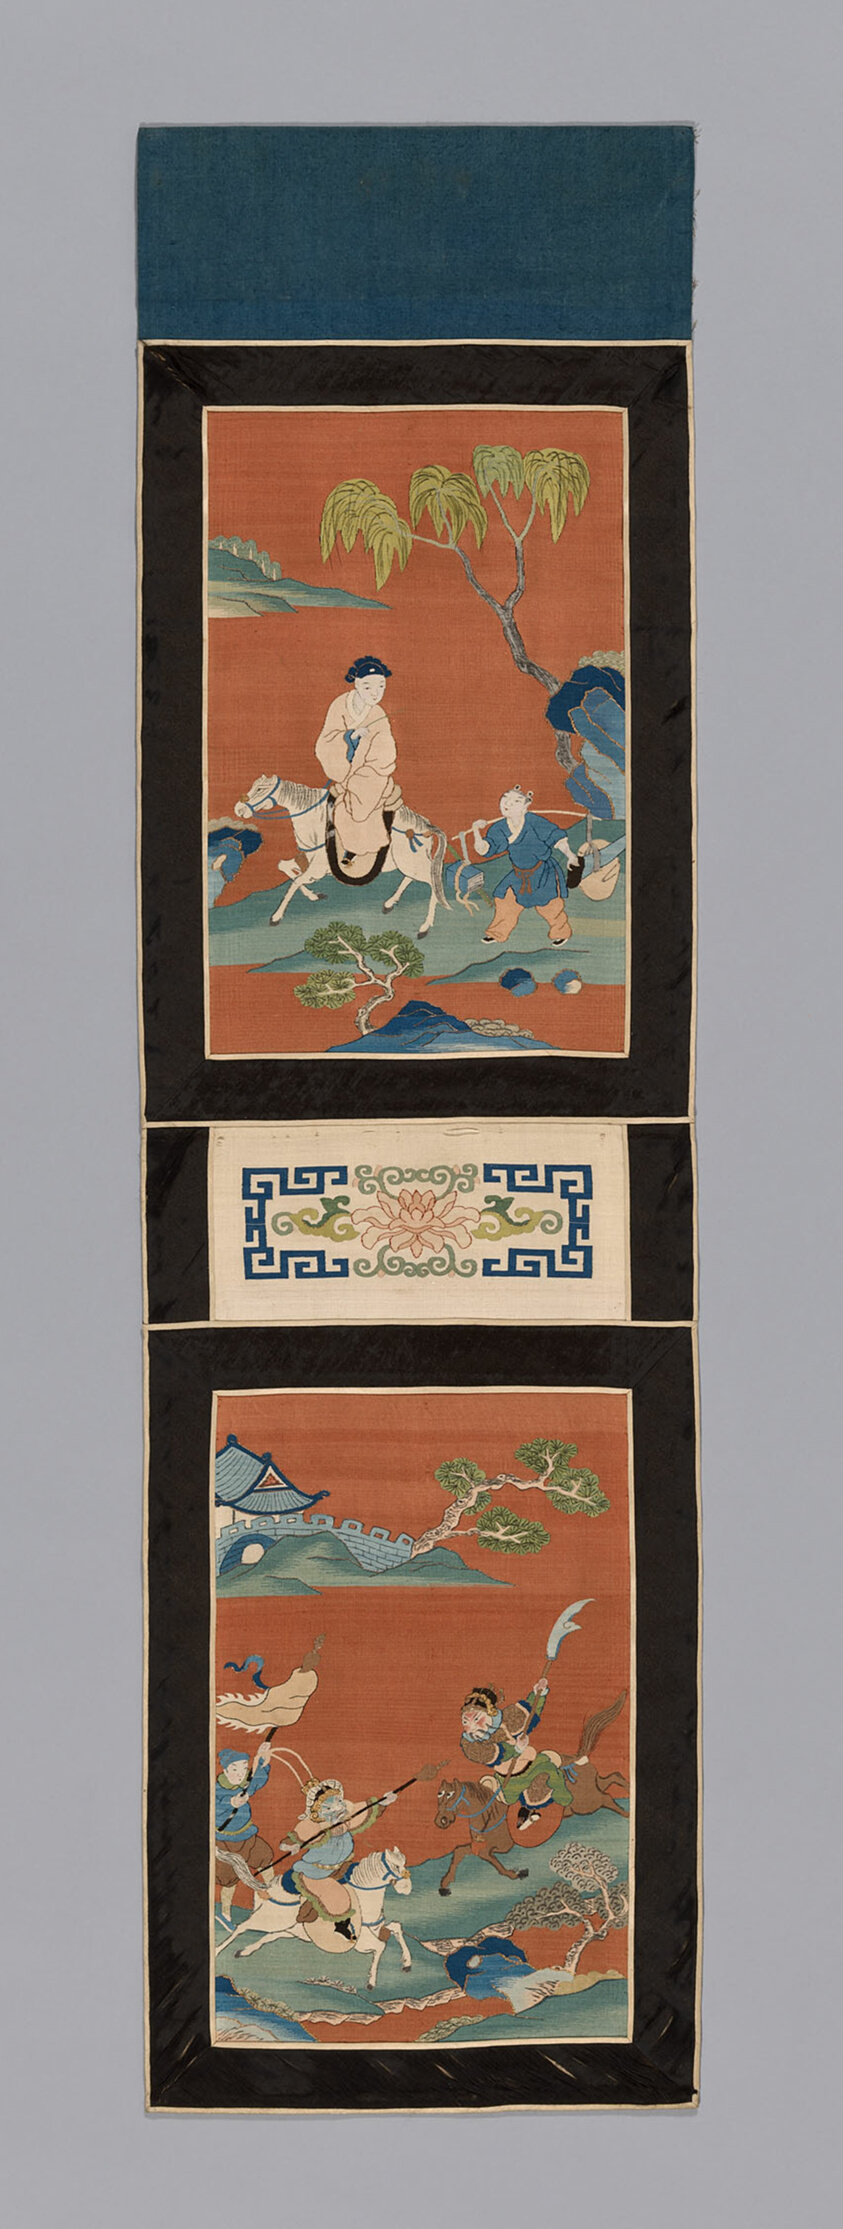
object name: Textile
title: Panel (For a Screen)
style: Chinese (culture or style), asian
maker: China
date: Qing dynasty (1644–1911), 1875/1900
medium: Panels: Silk, gold-leaf-over-lacquered-paper-wrapped silk, slit tapestry weave with extended weft and interlaced outlining wefts; painted; borders: silk and cotton, warp-float faced 5:1 satin weave; inner and outer edges: silk, warp-float faced 4:1 satin weave; lining: cotton, plain weave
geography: China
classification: weaving - tapestry; weaving; textile